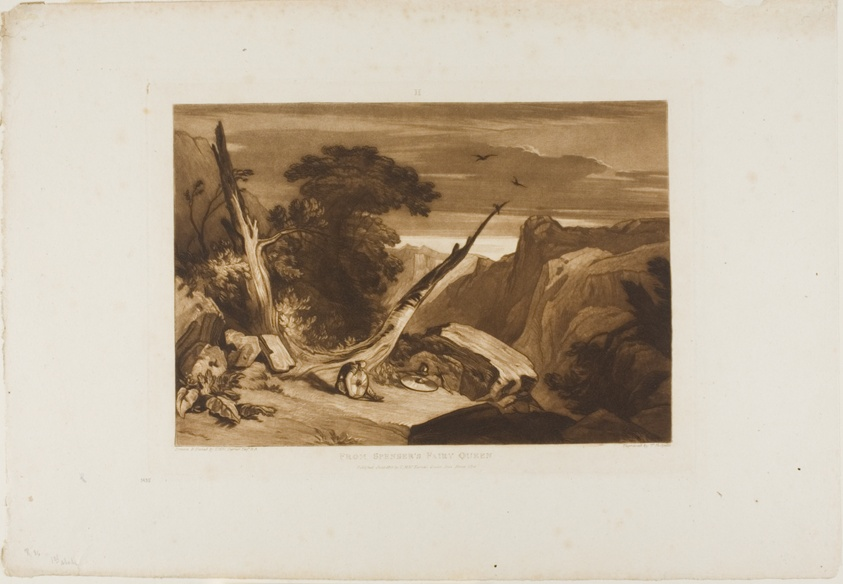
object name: Print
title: From Spenser's Fairy Queen, plate 36 from Liber Studiorum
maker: Joseph Mallord William Turner (English, 1775-1851); engraved by Thomas Hodgetts (English, active 1801–1846)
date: published June 1811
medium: Mezzotint and etching in brown on ivory wove paper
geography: England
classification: etching; print; prints and drawing